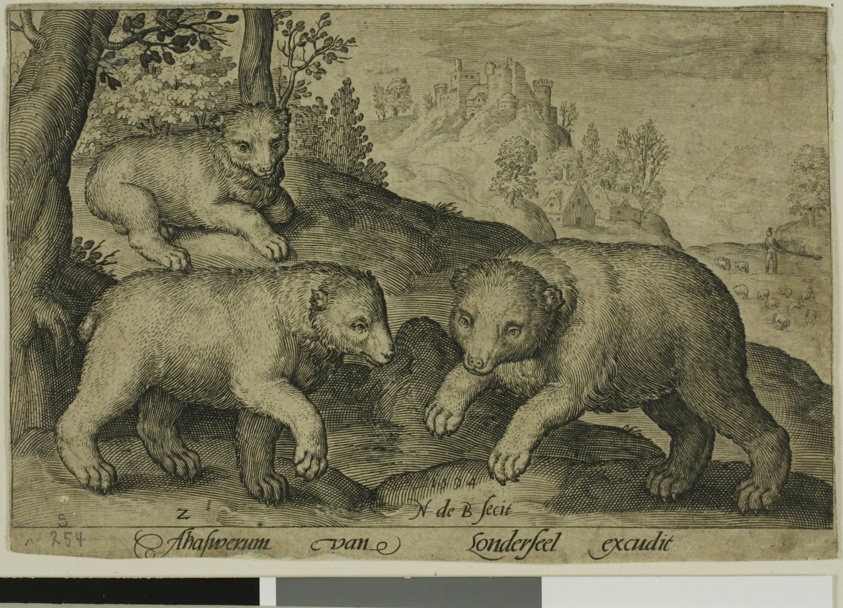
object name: Print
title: Three Bears, plate ten from Four-Legged Animals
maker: Nicolaes de Bruyn (Flemish, 1571-1656); published by Assuerus van Londerseel (Flemish, 1572-1635)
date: 1594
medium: Engraving in black on cream laid paper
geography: Flanders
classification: engraving; print; prints and drawing